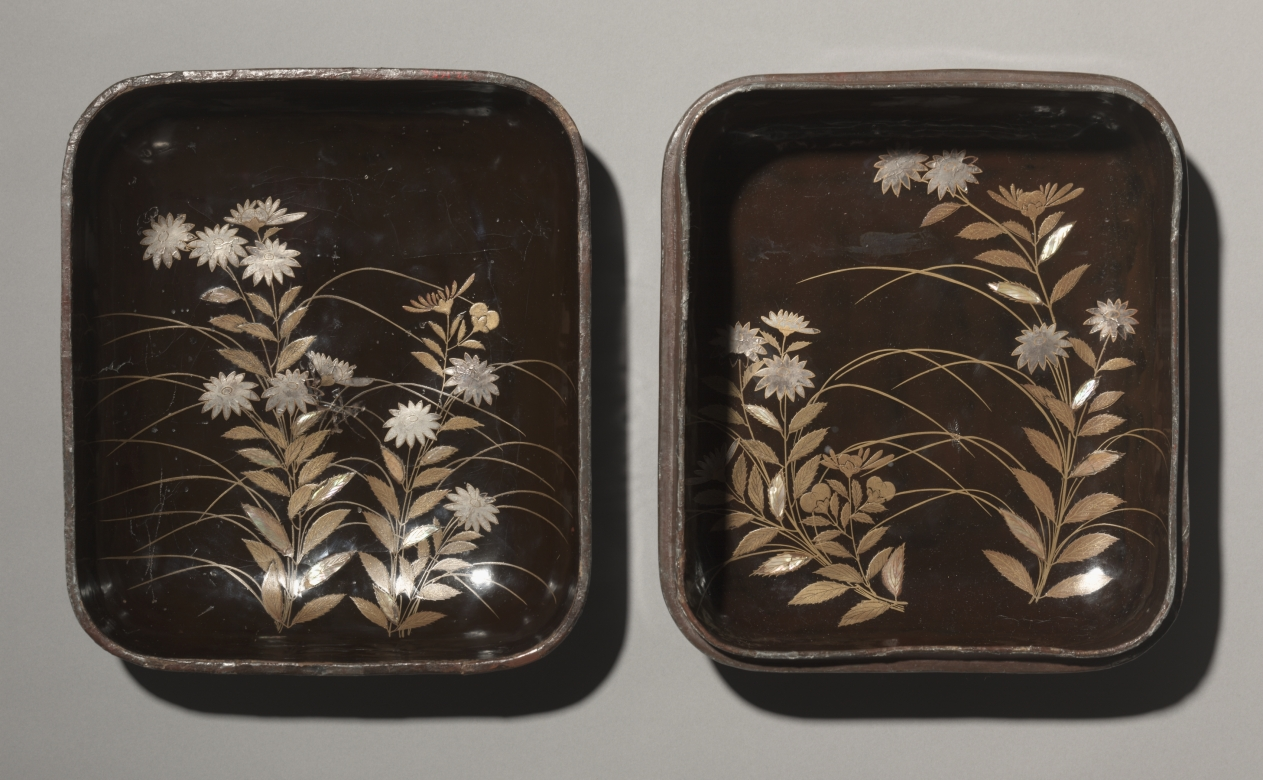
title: Letter Box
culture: Japan, Edo period (1615–1868)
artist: manner of Ogata Kōrin (Japanese, 1658–1716)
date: 1700s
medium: lacquer with pewter and mother-of-pearl inlay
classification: Lacquer